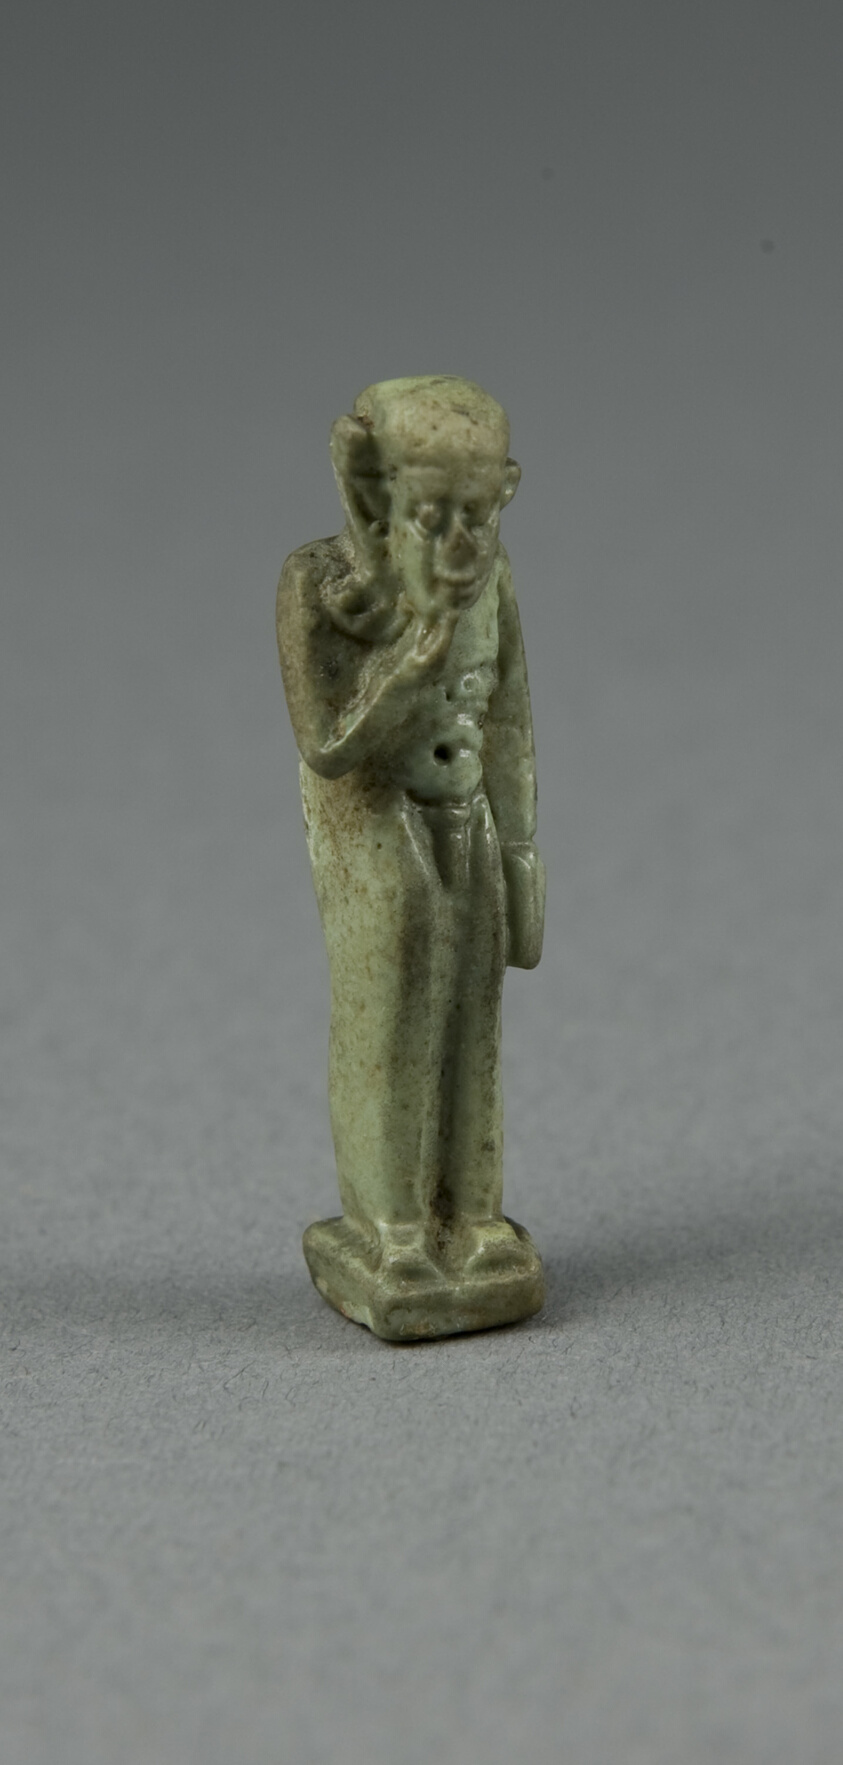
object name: Costume and Accessories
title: Amulet of the God Horus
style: third intermediate period, egyptian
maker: Egyptian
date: Third Intermediate Period, Dynasty 21–25 (1070–656 BCE)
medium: Faience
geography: Egypt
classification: amulet; jewelry; ceramics; ancient art; costume; faïence (composite material)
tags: gods (deities)